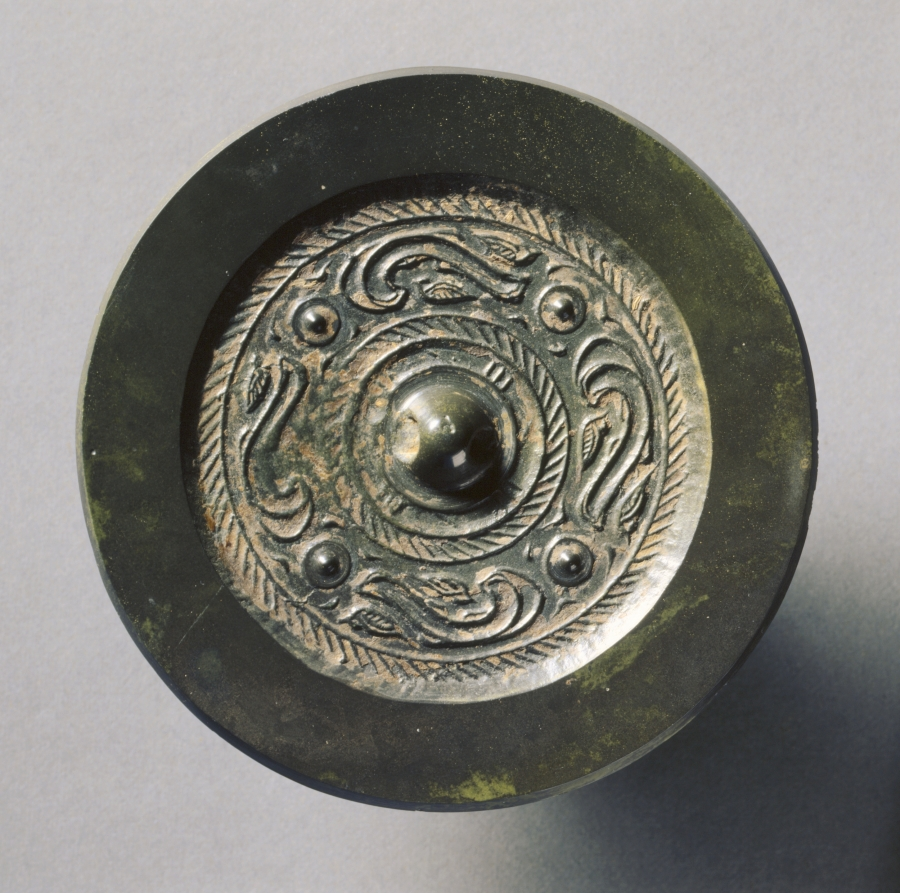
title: Mirror with Four Nipples, Quasi-Dragons, and Birds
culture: China, Western Han dynasty (206 BCE–8 CE)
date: late 300s BCE–50 CE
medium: bronze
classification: Metalwork